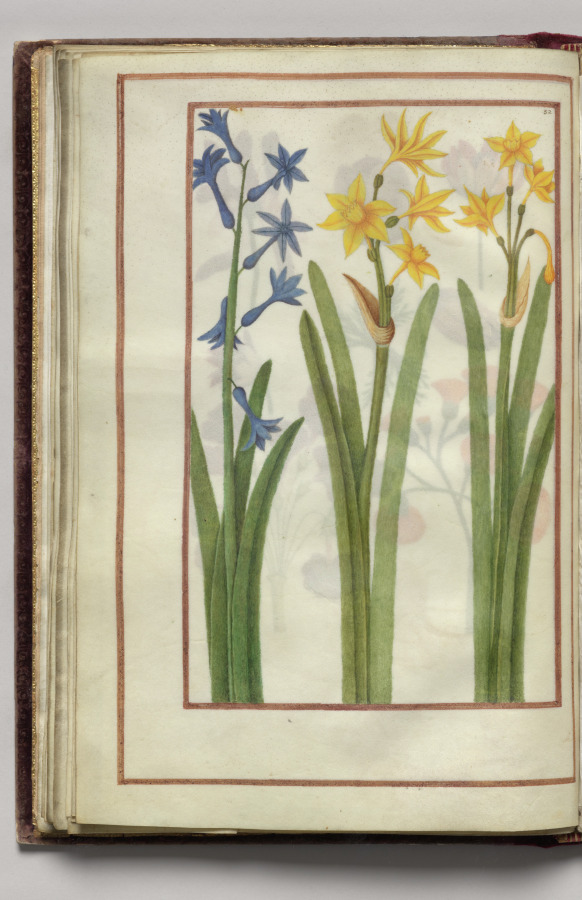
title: Blue Hyacinth and Yellow Narcissus, folio 18 (verso), from Florilegium (A Book of Flower Studies)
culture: France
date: 1608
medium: watercolor, ink, silver, and gold over occasional traces of pencil, on vellum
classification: Bound Volume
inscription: Dated: Poitiers 1608 (on frontispiece) Signed: On frontispiece in black ink, lower right: Van Kuyk Notation on drawing: Frontispiece: in pencil, lower margin: * élève de Van Kessel, peintre flammand (* in pencil also appears in front of Van Kuyk's name).